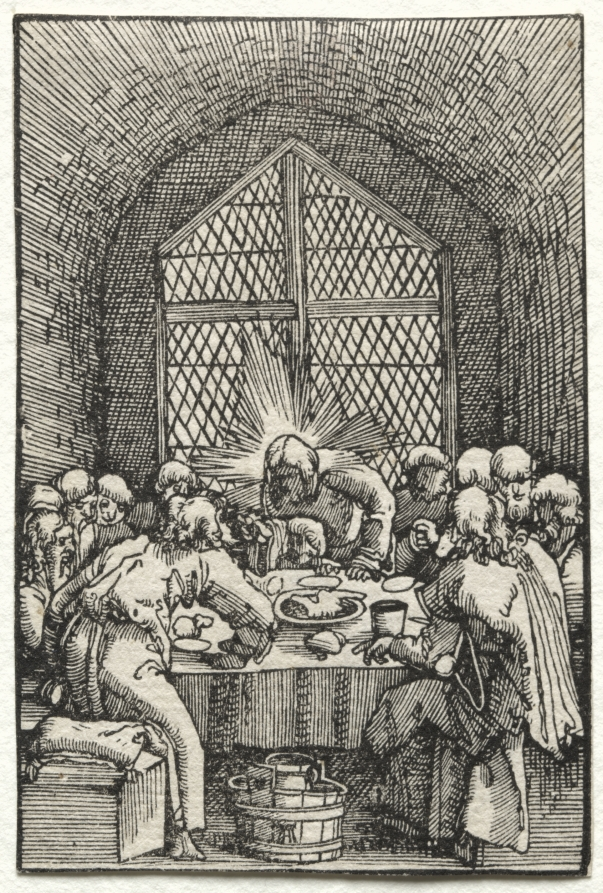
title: The Fall and Redemption of Man: The Last Supper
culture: Germany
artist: Albrecht Altdorfer (German, c. 1480–1538)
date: c. 1515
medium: woodcut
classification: Print